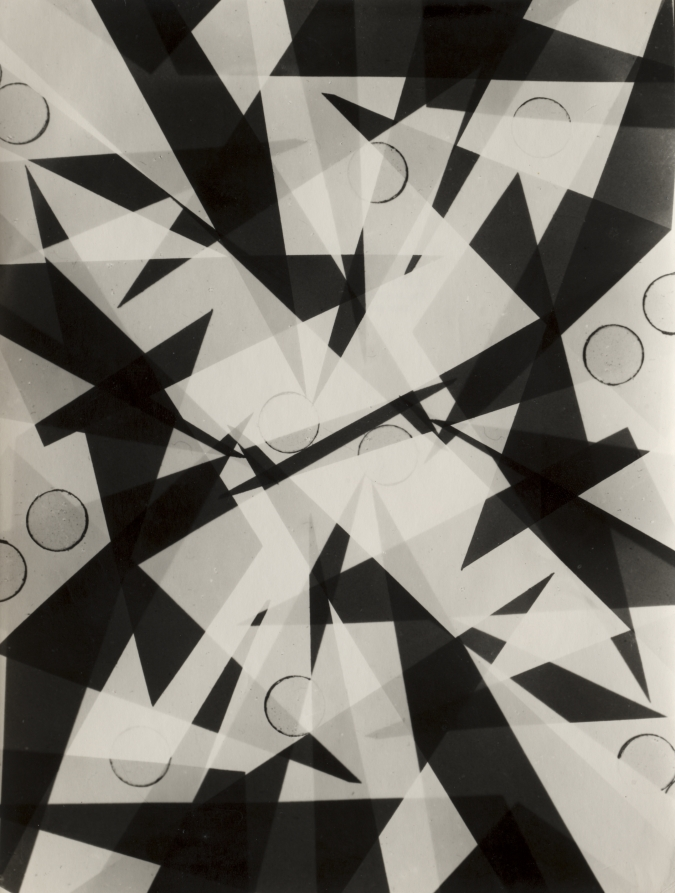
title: Geometric Abstraction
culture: Netherlands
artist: Pim van Os (Dutch, 1910–1954)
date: c. 1950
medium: gelatin silver print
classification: Photograph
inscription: Written in black ink on verso: "top"; in pencil: "PVO-011"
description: Active just after World War II, Pim van Os was a pioneering Dutch photographer who gained considerable recognition in postwar Europe for his experimental imagery. This abstract composition was made exclusively with the camera, and the movement of light is both the means of expression and the subject of the picture. Layered geometric shapes give the slightest sense of a three-dimensional arrangement of bold shapes.